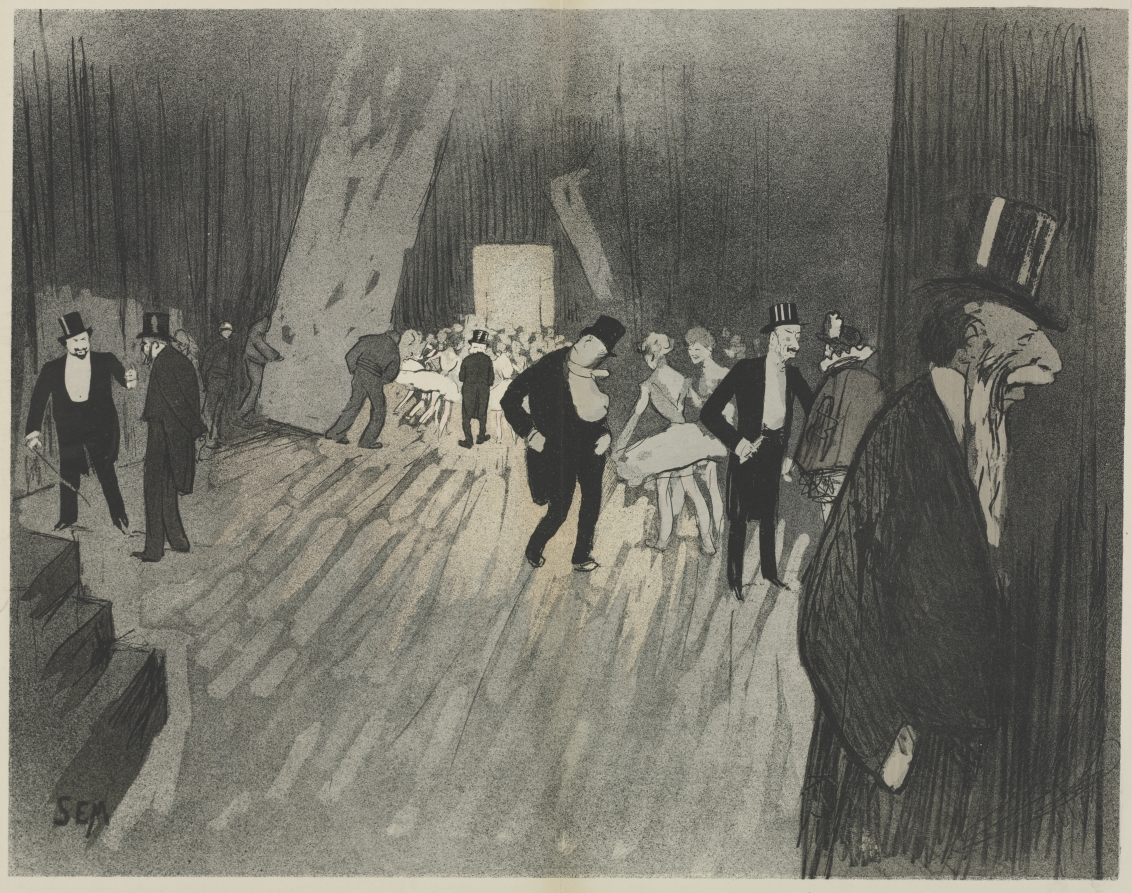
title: Backstage of the Ballet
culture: France, 19th century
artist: Sem (Georges Gourçat) (French, 1863–1934)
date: c. 1900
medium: lithograph hand-colored with watercolor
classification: Print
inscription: lower left, in stone: S.E.M.